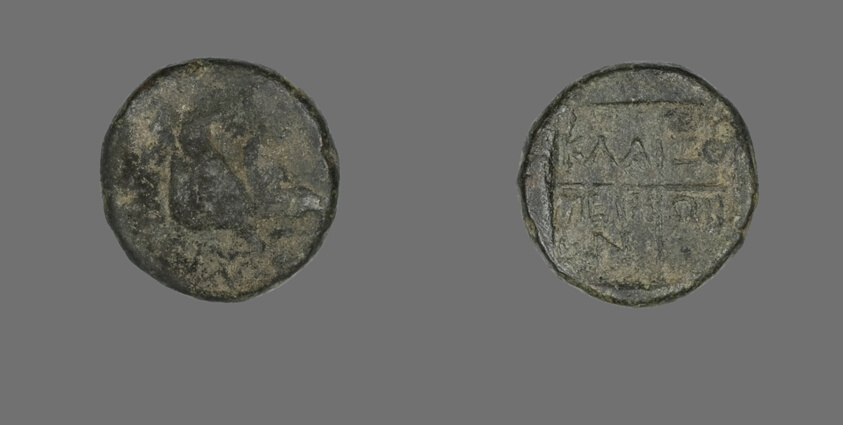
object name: Coin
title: Coin Depicting a Boar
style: greek, ancient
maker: Greek; Klazomenai, Ionia (now Turkey)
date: about 190 BCE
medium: Bronze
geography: Ancient Greece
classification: coin; ancient art